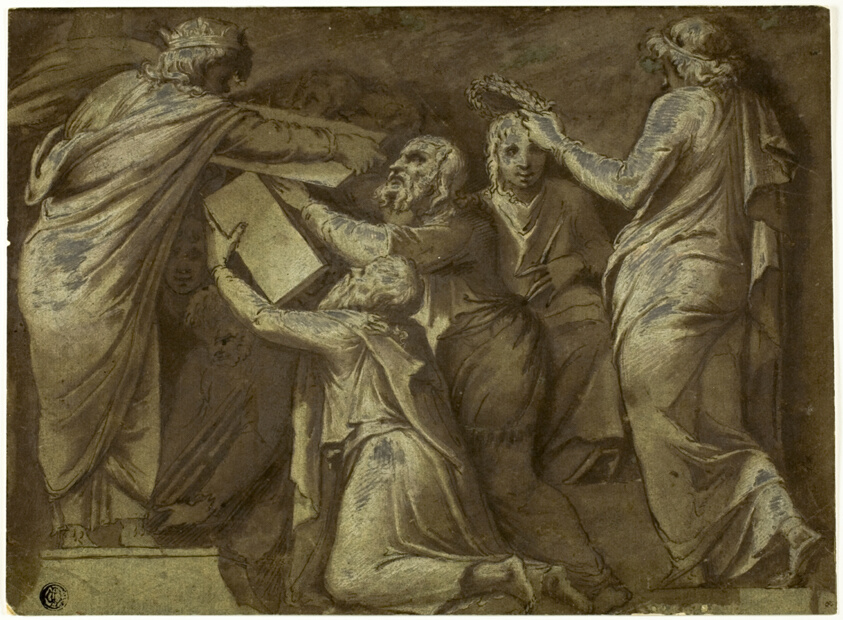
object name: Drawing and Watercolor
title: Numa Pompilius Giving the Laws to the Romans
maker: Possibly Giovanni Battista Galestruzzi (Italian, 1615-c. 1669); after Polidoro Caldara, called Polidoro da Caravaggio (Italian, c. 1499-c.1543)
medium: Pen and brown ink, with brush and brown wash, heightened with lead white (discolored) and touches of pink gouache, on blue laid paper, laid down on ivory laid paper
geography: Italy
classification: ink or chalk wash; drawings (visual works); prints and drawing